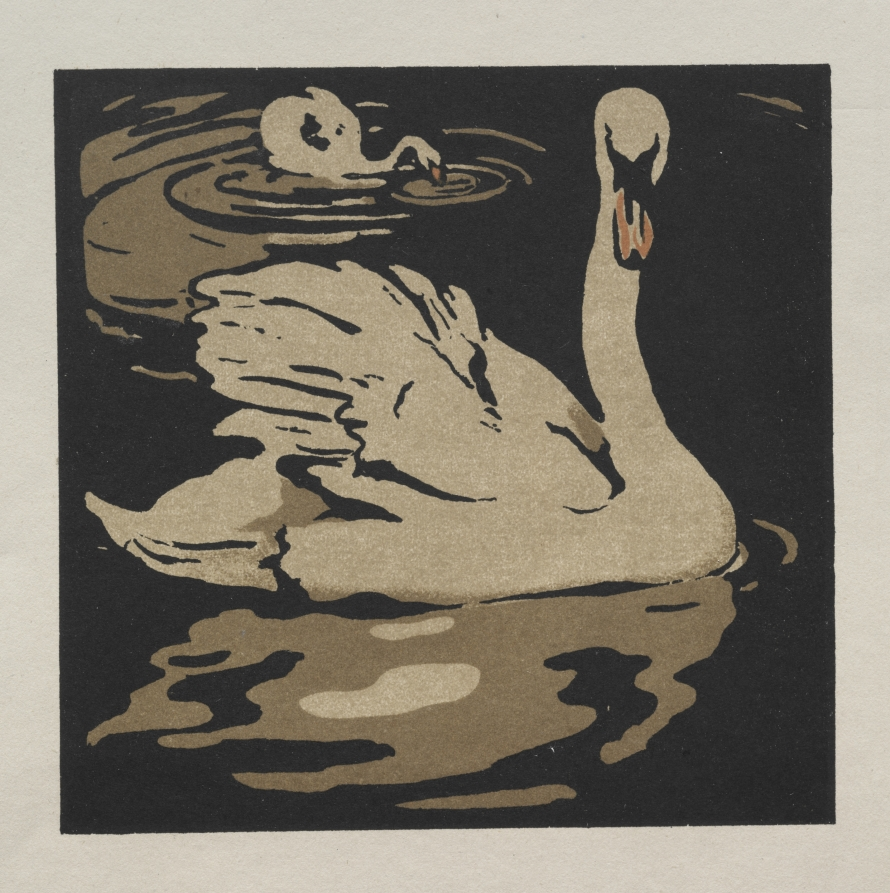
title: The Square Book of Animals: The Beautiful Swan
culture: England, early 20th Century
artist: William Nicholson (British, 1872–1949)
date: 1899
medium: hand-colored lithographic reproduction of a woodcut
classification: Print